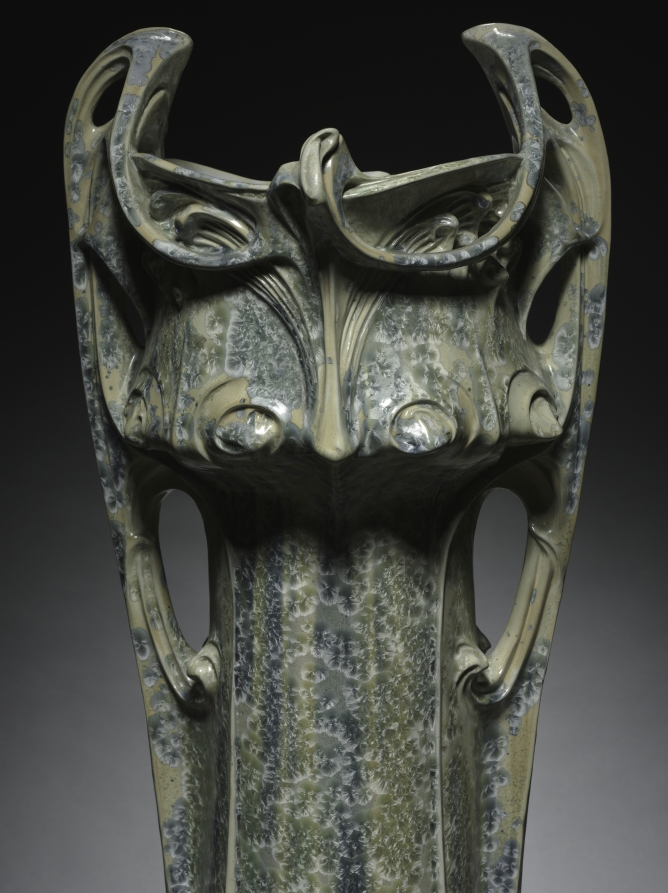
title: Vase des Binelles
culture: France, Sèvres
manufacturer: Sèvres Porcelain Factory (French, est. 1756)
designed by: Hector Guimard (French, 1867–1942)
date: 1903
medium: stoneware with crystalline glaze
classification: Ceramic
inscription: Gres 1903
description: In 1899, French architect Hector Guimard designed the Castle Henriette, built on Rue des Binelles in Sèvres, a suburb of Paris, France. This stoneware vase is named for the street and bears similarities to architectural features of Castle Henriette. The vase’s asymmetrical and curvilinear design showcases the trademarks of the Art Nouveau style. Five examples of the Vase des Binelles were made by the still-operating Sèvres Manufactory, whose ceramics were celebrated for their innovative decoration and design since its establishment in the mid-1700s.